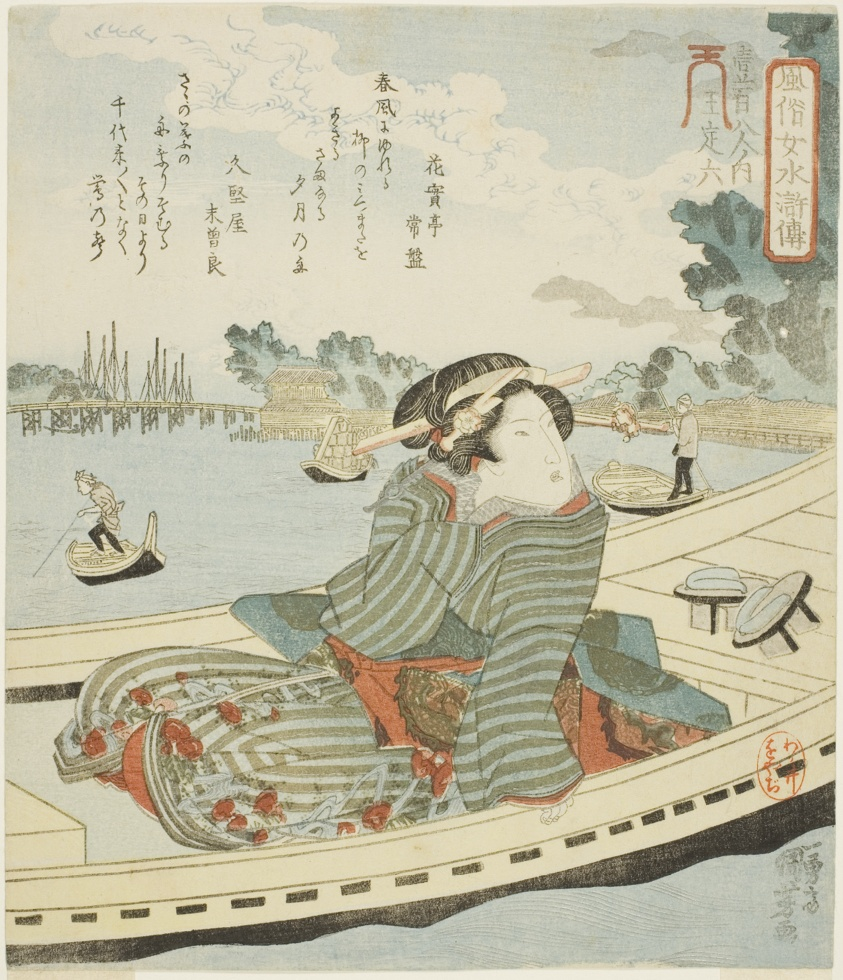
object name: Print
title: Oteiroku, from the series "Fashionable Women as the One Hundred and Eight Heroes of the Water Margin (Fuzoku onna Suikoden, ippyakuhachinin no uchi)"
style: Japanese (culture or style)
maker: Utagawa Kuniyoshi (Japanese, 1797-1861)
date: c. 1828/30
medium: Color woodblock print; surimono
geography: Japan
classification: woodblock print; print; asian art